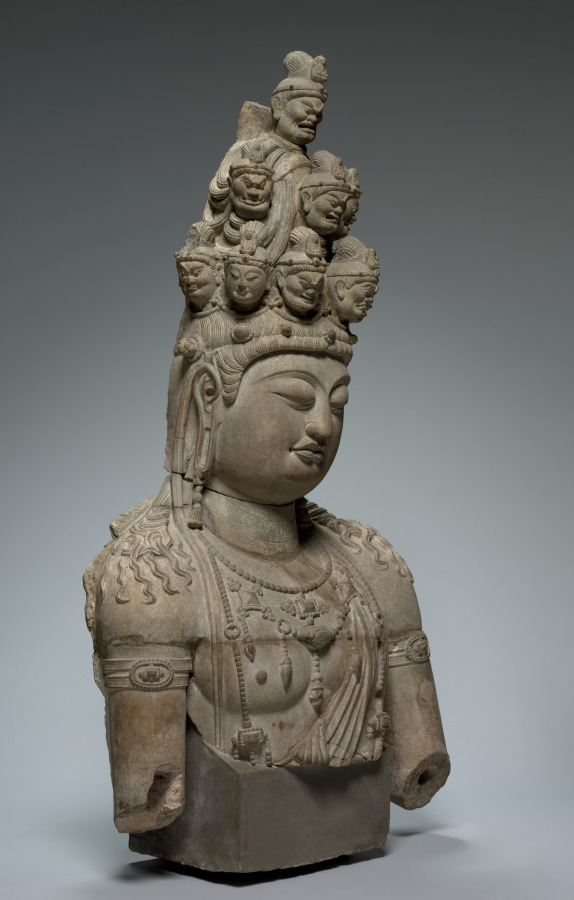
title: Eleven-Headed Guanyin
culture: China, Tang dynasty (618-907)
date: early 700s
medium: gray sandstone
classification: Sculpture